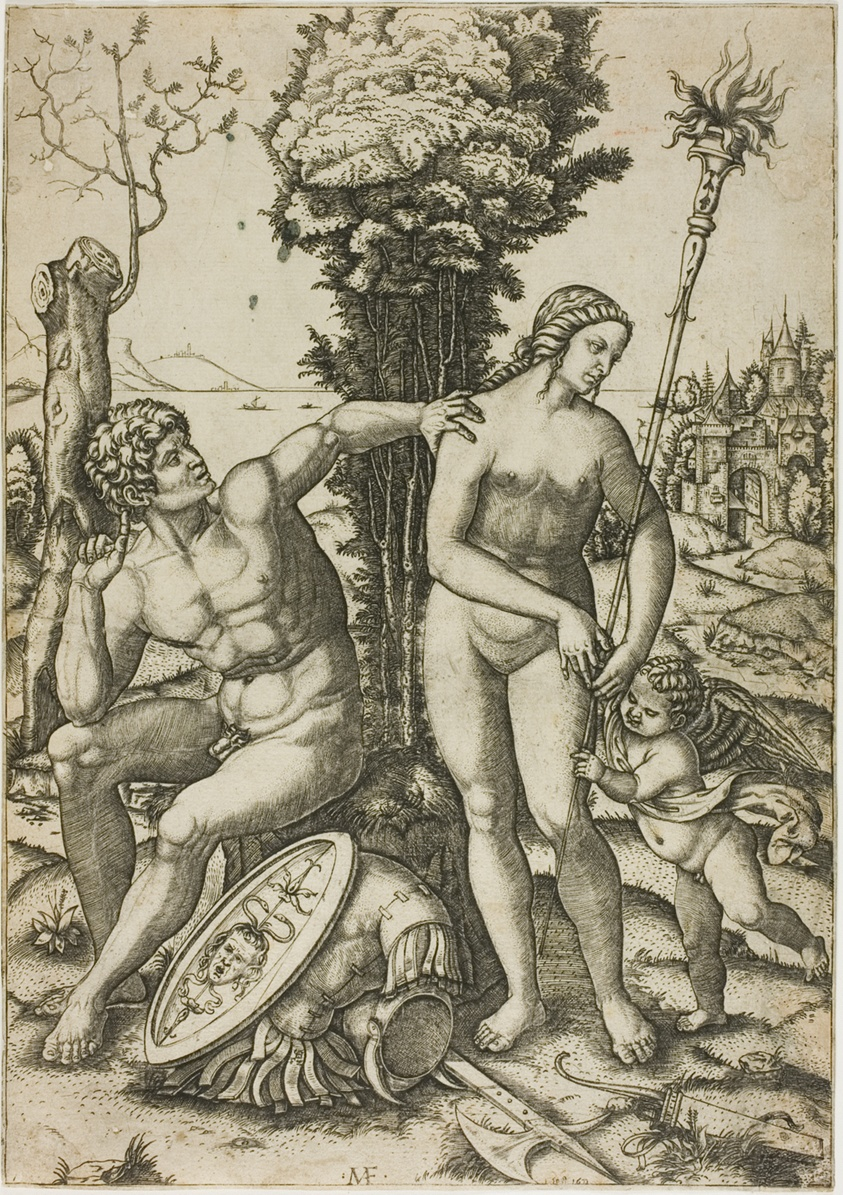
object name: Print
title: Mars, Venus, and Cupid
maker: Marcantonio Raimondi (Italian, c. 1480-1534)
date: 1508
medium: Engraving printed in black on paper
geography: Italy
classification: engraving; print; prints and drawing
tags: mythology